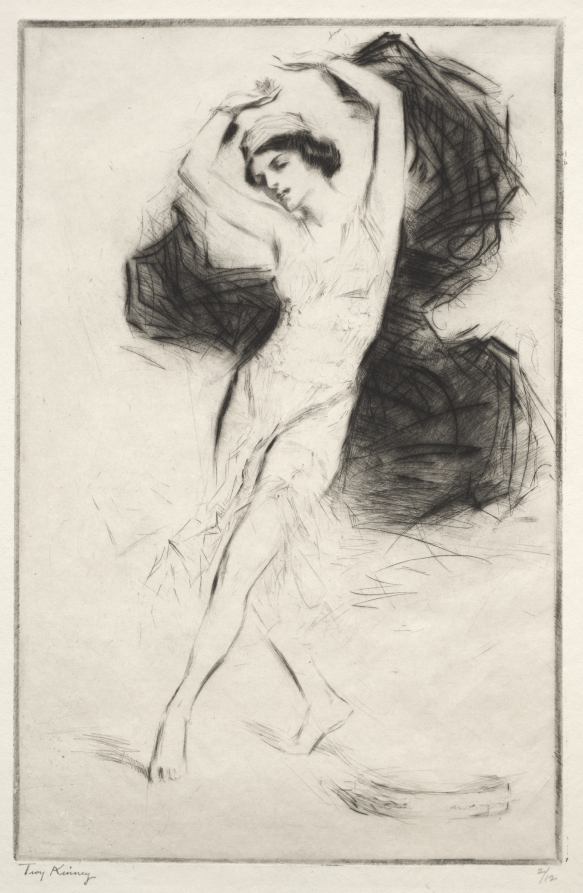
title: Sophie Pflanz in Cleopatre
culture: America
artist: Troy Kinney (American, 1871–1938)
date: c. 1920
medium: drypoint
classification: Print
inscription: Signed in pencil on bottom left beneath image: Troy Kinney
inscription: Marked in pencil on bottom right beneath image: 2/12